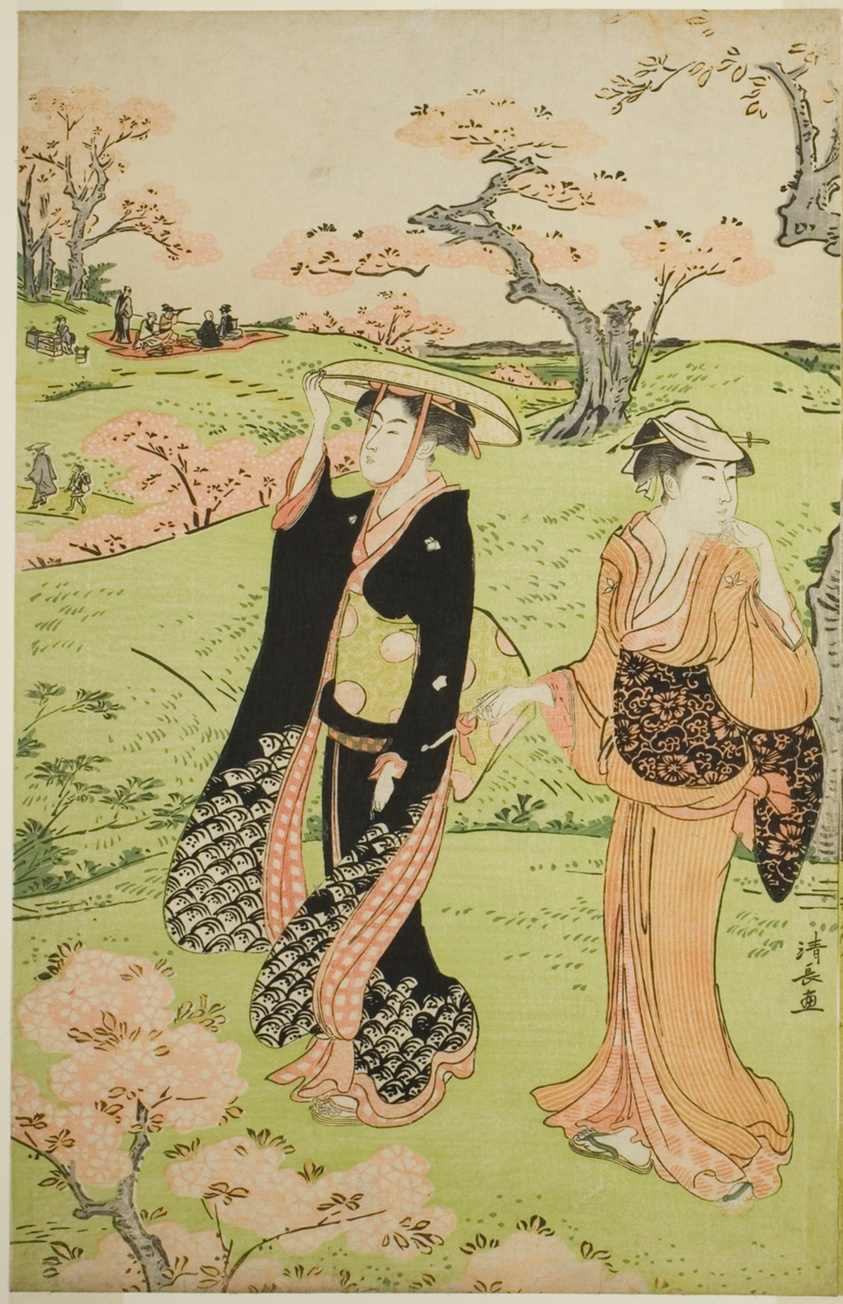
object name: Print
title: Cherry Blossom Viewing at Asuka Hill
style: Japanese (culture or style)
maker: Torii Kiyonaga (Japanese, 1752-1815)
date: c. 1787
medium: Color woodblock print; center sheet of oban triptych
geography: Japan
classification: woodblock print; print; asian art